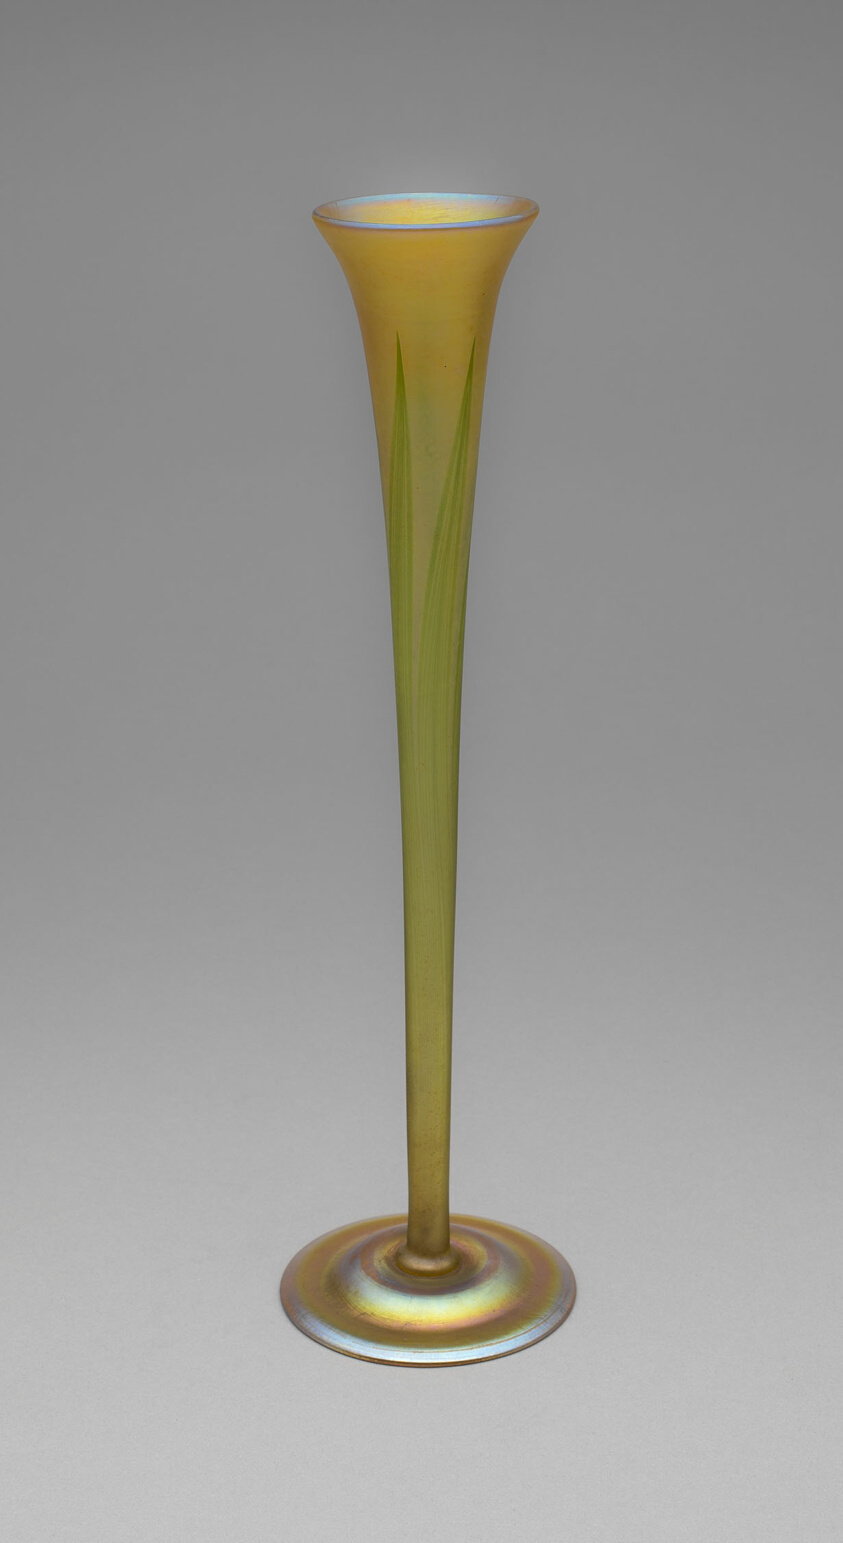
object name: Glass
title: Bud vase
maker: Louis Comfort Tiffany (American, 1848–1933); Tiffany Studios (American, 1902–32); Corona, New York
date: 1915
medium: Favrile glass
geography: Corona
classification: vase; glass; american decorative arts; american arts; decorative arts